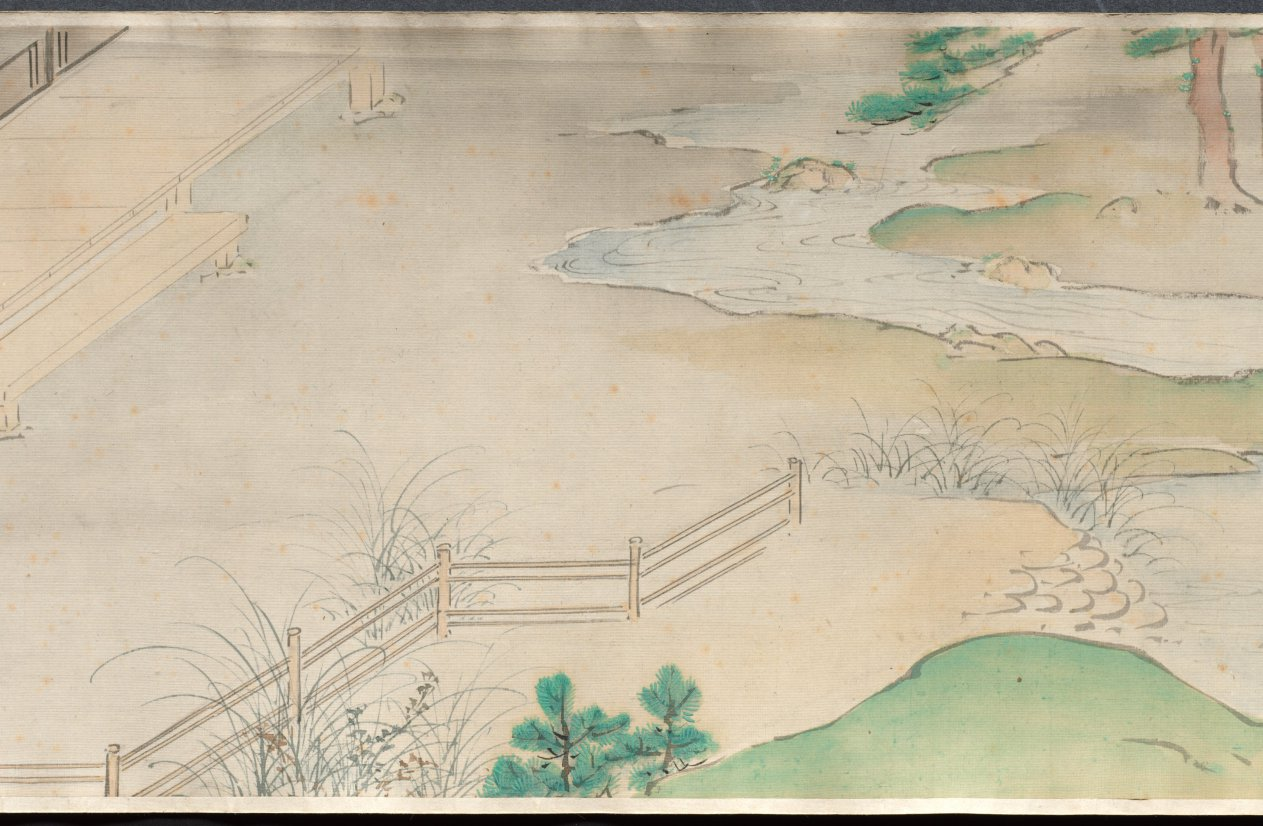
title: The Shadow Dancers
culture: Japan, Edo period (1615–1868)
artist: Yamamoto Baiitsu (Japanese, 1783–1856)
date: 1800s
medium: handscroll, ink and color on silk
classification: Painting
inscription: artist's signature and two seals at end of painting.